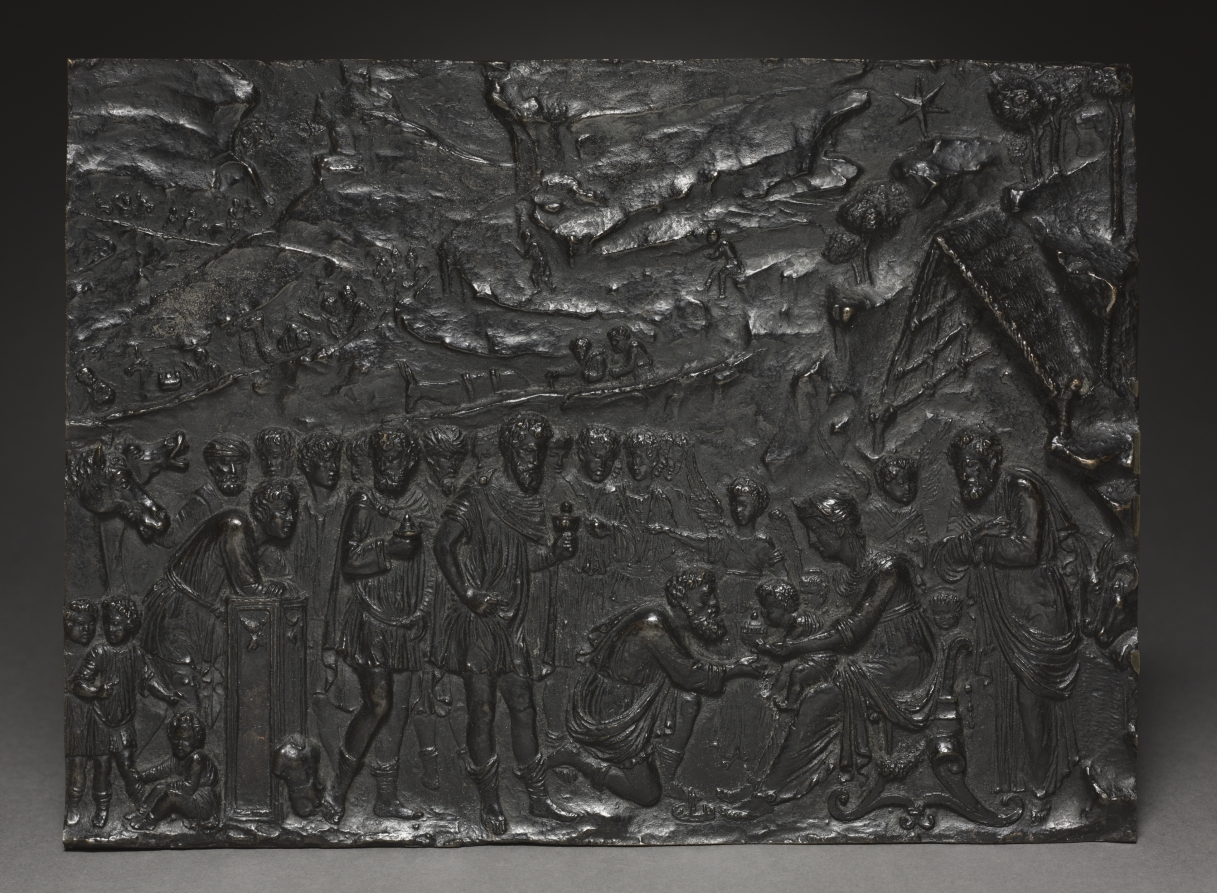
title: Adoration of the Magi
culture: Italy, first quarter 16th century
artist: attributed to Giulio della Torre (Italian, c. 1481–before 1563)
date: c. 1500–1525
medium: bronze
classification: Sculpture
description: Figures leading livestock descend the winding rocky landscape in the background while in the foreground, a crowd gathers before the Holy Family. The traveling figures compose the majority of this plaque, communicating the haste and urgency on their journey to see Christ. Above the Holy Family, a rustic hut creates a canopy. The Madonna and Child sit prominently at the right on a Renaissance bench, receiving the Three Kings. The first king kneels as the Christ Child bends to accept the gift. Joseph stands cross-armed behind the Madonna with two winged angels at his side. Behind him are the heads of an ox and an ass, traditional elements of nativity scenes. To the left three children play while a youth leans on a pagan altar. The torso of an ancient sculpture lies on the ground before it, demonstrating that Christ has come to replace the ancient gods. This low-relief plaque was once believed to have been destroyed in 1914 but is now thought to have been a part of the Count W. Pourtalès collection in St. Petersburg, Russia. Adoration of the Magi resembles a 1506 relief by Riccio made for the Easter Candle in the Basilica of St. Anthony in Padua.